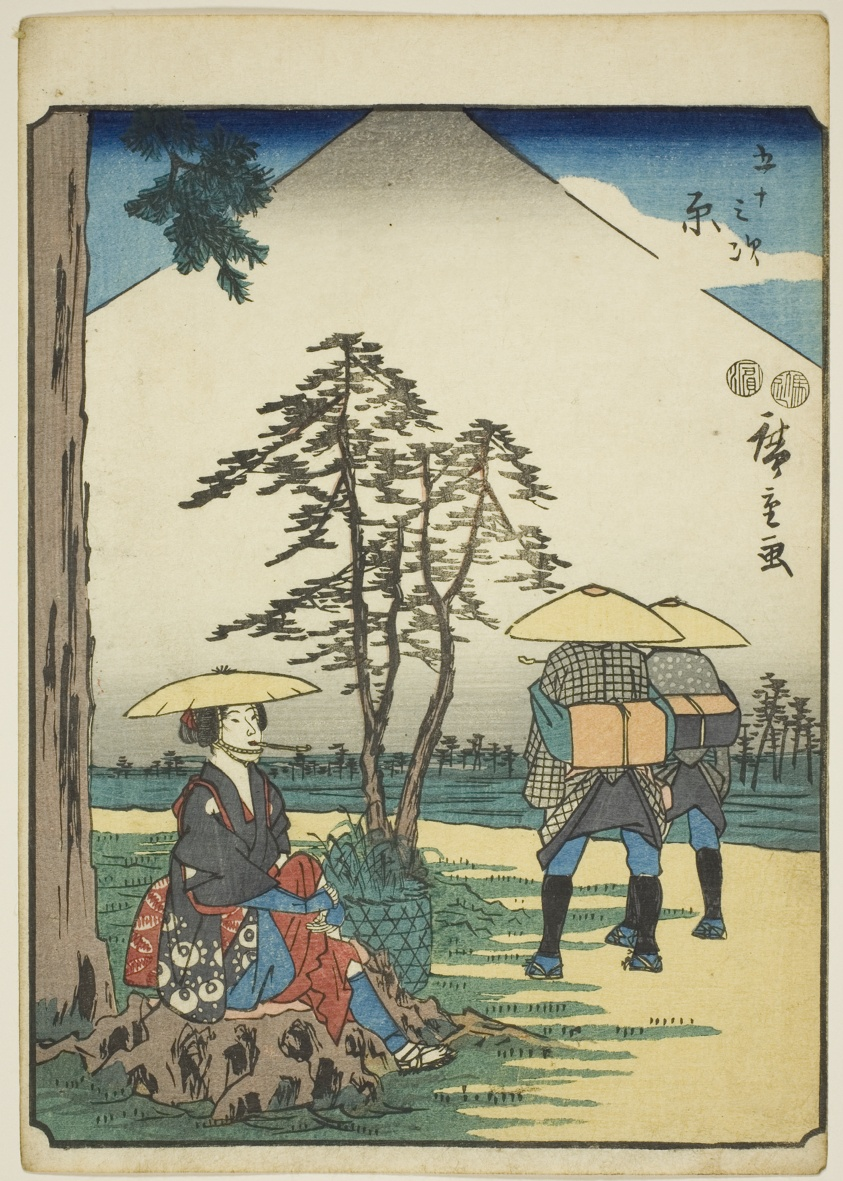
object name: Print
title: Hara, from the series "Fifty-three Stations [of the Tokaido] (Gojusan tsugi)," also known as the Figure Tokaido (Jinbutsu Tokaido)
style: Japanese (culture or style)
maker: Utagawa Hiroshige 歌川 広重; Japanese, 1797-1858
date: 1852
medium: Color woodblock print; chuban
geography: Japan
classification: woodblock print; print